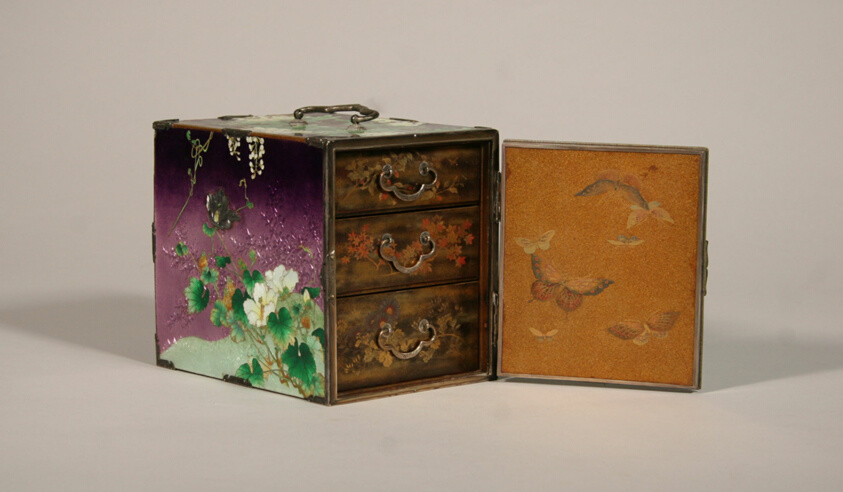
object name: Decorative Arts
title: Kodansu Small Chest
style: Japanese (culture or style)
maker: Japanese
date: early 20th century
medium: Enamel on silver, lacquer, and engraved silver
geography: Japan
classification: lacquerware; asian art; decorative arts